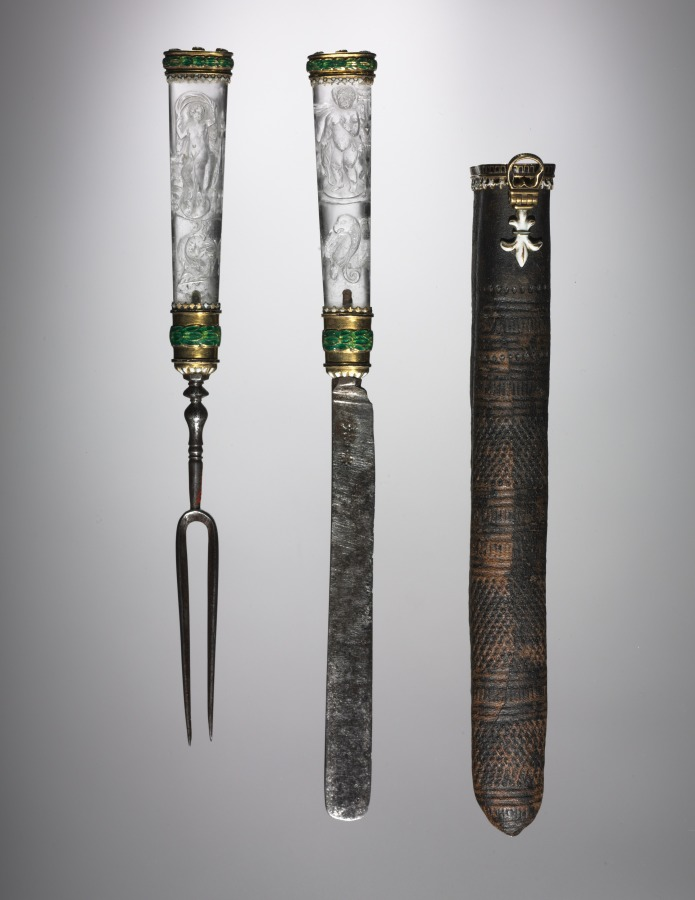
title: Knife and Fork with Sheath Set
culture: Italy, Venice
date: late 1500s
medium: gold, enamel, crystal, steel, leather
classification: Enamel